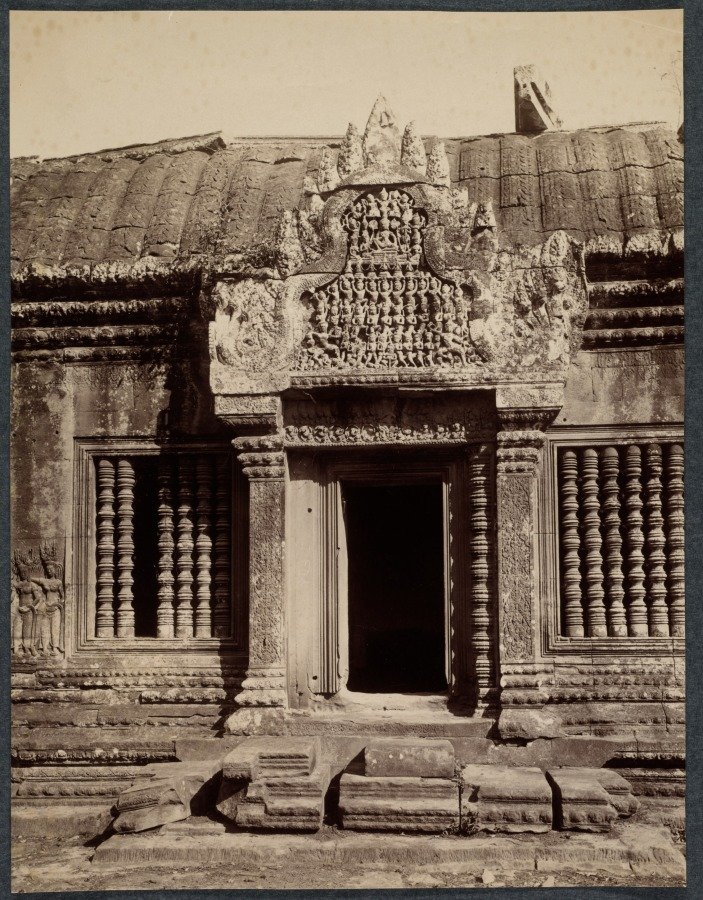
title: Doorway Through an Inner Enclosure, Angkor Wat, Cambodia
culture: India, 19th century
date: c. 1880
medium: Albumen print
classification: Photograph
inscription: Written in pencil on verso: "Porte interieur. Angkor Wat./(N-E)/3000" Imprinted in black type on adhesive label on polyethylene sleeve: "Anonyme (U658)/Porte interieur du temple d'Angkor Wat/Cambodge, circa 1880. Tirage albumen d'epoque 26.8 x 20.4cm/300.00"